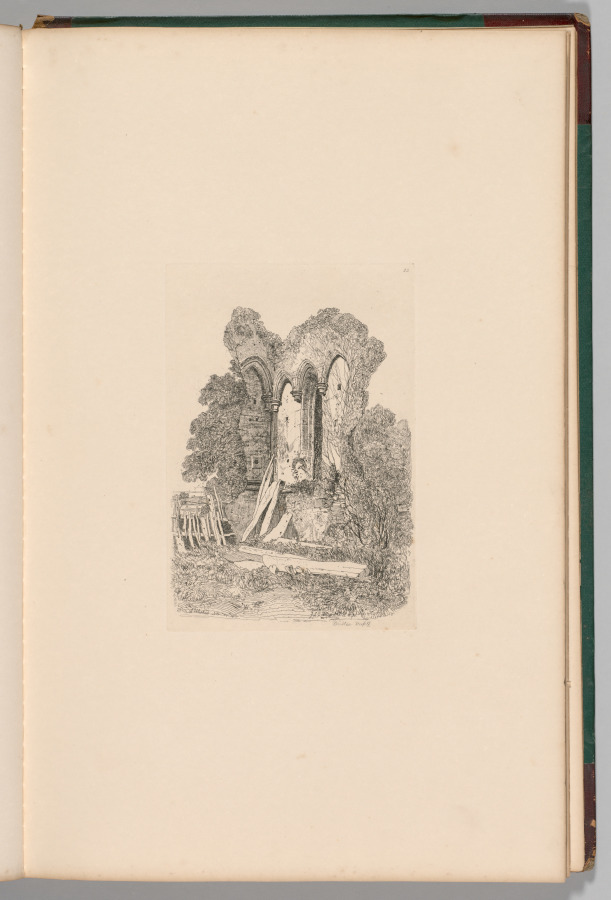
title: Liber Studiorum: Plate 23, Ruins at Beeston, Norfolk: No. 3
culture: England, 19th century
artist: John Sell Cotman (British, 1782–1842)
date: 1838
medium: softground etching, from a bound volume containing 48 plates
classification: Bound Volume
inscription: In plate, within image, upper right: 23; in plate, lower left, within image: Published Novr 24th 1810; in plate, lower right, within image: J S Cotman Del et Sc.; in plate, below image: Beeston, Norfolk